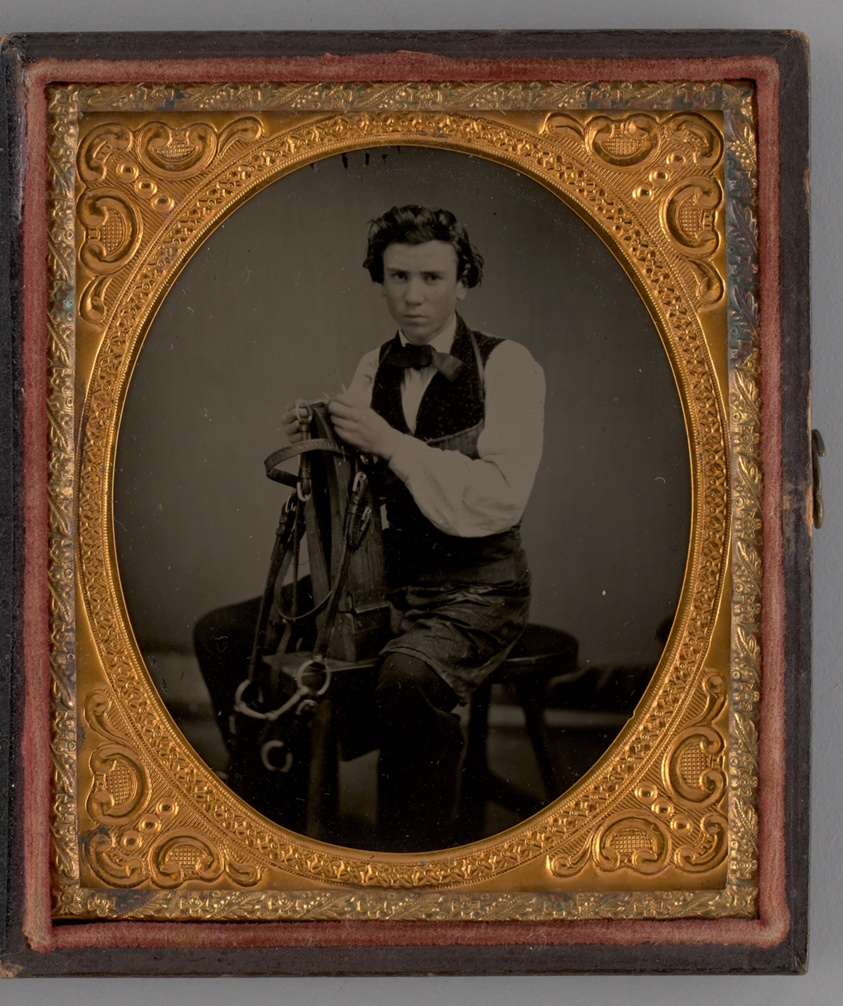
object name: Photograph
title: Untitled (Edward France, Harness Maker)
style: 19th century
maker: Wade P. Canal (American, 19th century)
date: 1860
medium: Ambrotype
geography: United States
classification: portrait; ambrotype; photograph; photographic process; photography; portrait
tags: lundberg collection, portraits, portraits: male subject